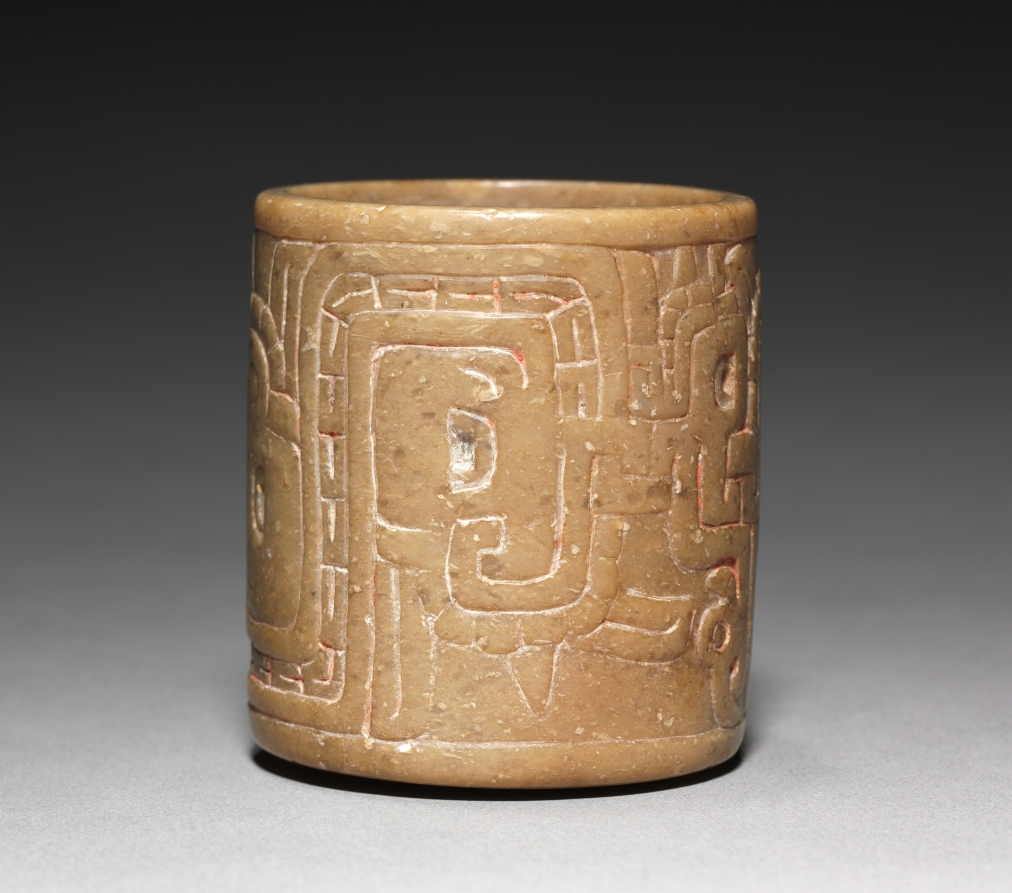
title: Cup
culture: Peru, North Coast, Cupisnique style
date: c. 900–600 BCE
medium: steatite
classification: Stone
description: While Chavín held sway in the highlands, coastal artists produced many objects in non-Chavín styles. Such is the case with these small, finely carved, stone containers, which were part of north coast ritual paraphernalia, though their specific use is unclear. Both bear complex designs based on fanged heads in profile that lack lower jaws.